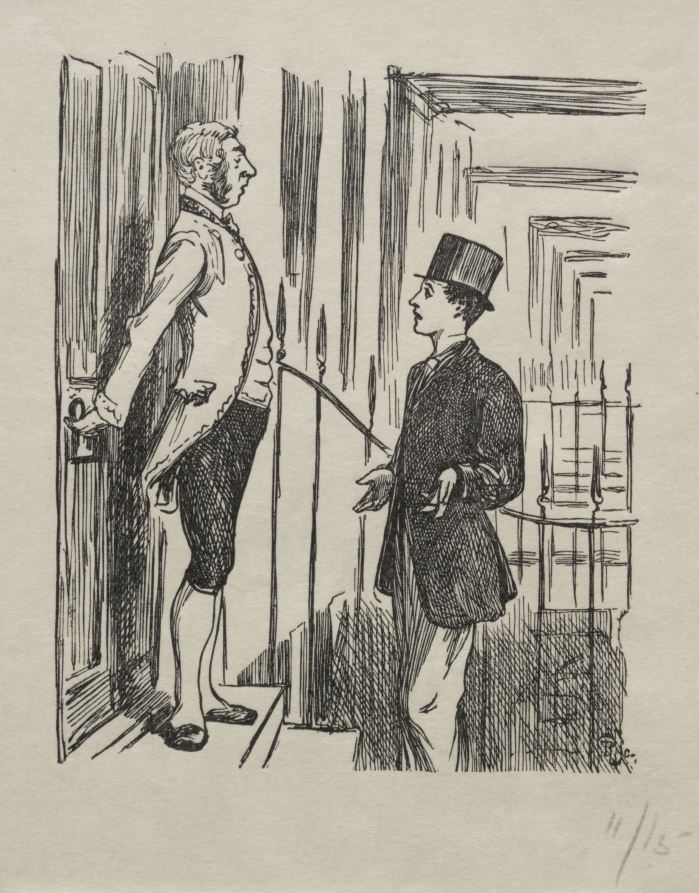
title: Coelebs in Search of a Mulready Envelope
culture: England, 19th century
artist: George Louis Palmella Busson Du Maurier (British, 1834–1896)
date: 1865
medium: wood engraving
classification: Print